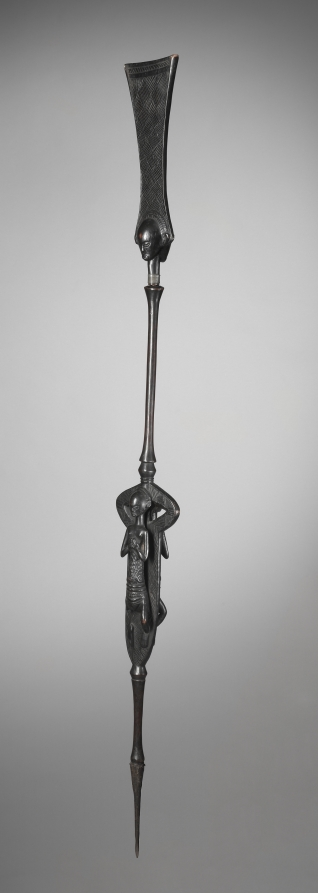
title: Staff of Office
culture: Central Africa, Democratic Republic of the Congo, Luba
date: early to mid-1800s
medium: Wood and iron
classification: Sculpture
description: Sanctified by a ritual specialist and enhanced with medicinal substances, the staff possessed supernatural qualities and was endowed with healing power. Luba staffs are among the most important regalia of Luba kings. The metal point alludes to the kingdom's stability and durability. Each staff has its own distinctive iconography to reflect regional styles. As Chief Msidi (former owner of this staff) ruled over the Yeke kingdom (and not the Luba kingdom), it begs the question of how he acquired this symbol of another realm's power.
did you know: The Yeke kingdom ruler Chief Msidi gave this as a gift of appreciation to the British missionary Frederick Stanley Arnot, whom the chief had invited to his kingdom.